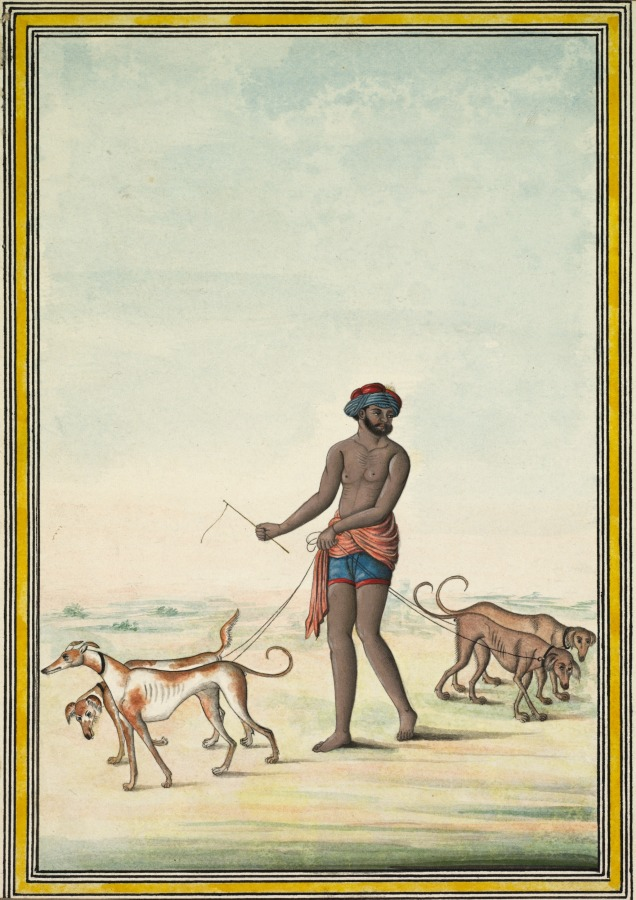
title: Dog Walker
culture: British India, Lucknow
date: early 1830s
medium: gum tempera and ink on paper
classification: Painting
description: Made for a set that would have been sold to a British East India Company affiliate, this painting by an Indian artist depicts an Indian servant attempting to comply with the British convention of walking dogs on a leash. He seems resigned to accommodating British wishes, but without a natural understanding of how to do so properly. Similarly, the artist creates a cursory landscape setting and awkward shadows under the figures to accord with the preferences of British collectors for spatial depth and realism, but these were not elements of traditional Indian painting, and they appear as half-hearted and unsuccessful as the dog walk.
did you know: William Ward worked as an exhibition designer at the Cleveland Museum of Art.